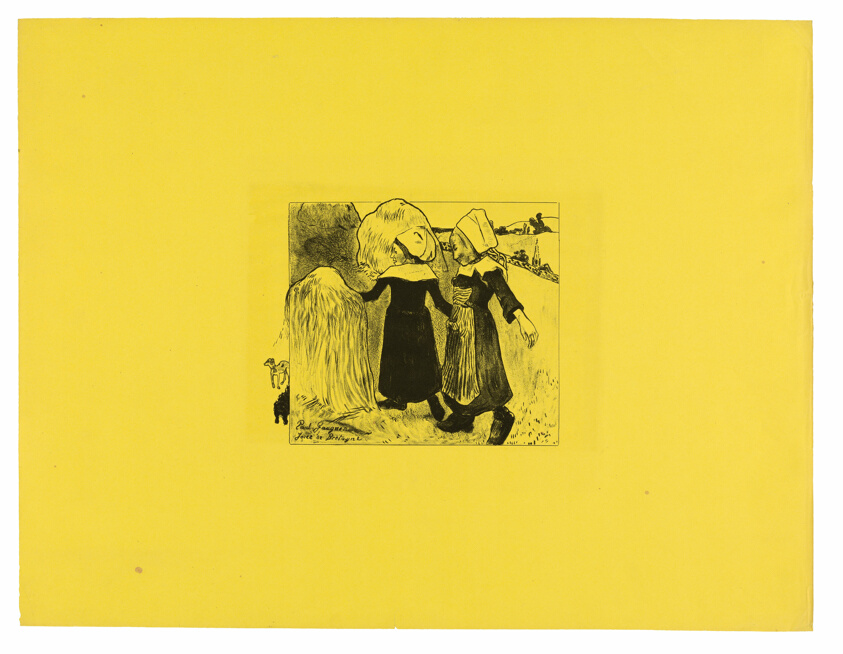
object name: Print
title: Joies de Bretagne (Joys of Brittany), from the Volpini Suite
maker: Paul Gauguin (French, 1848-1903)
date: 1889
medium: Zincograph in black on chrome yellow wove paper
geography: France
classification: zincograph; lithograph; print; prints and drawing